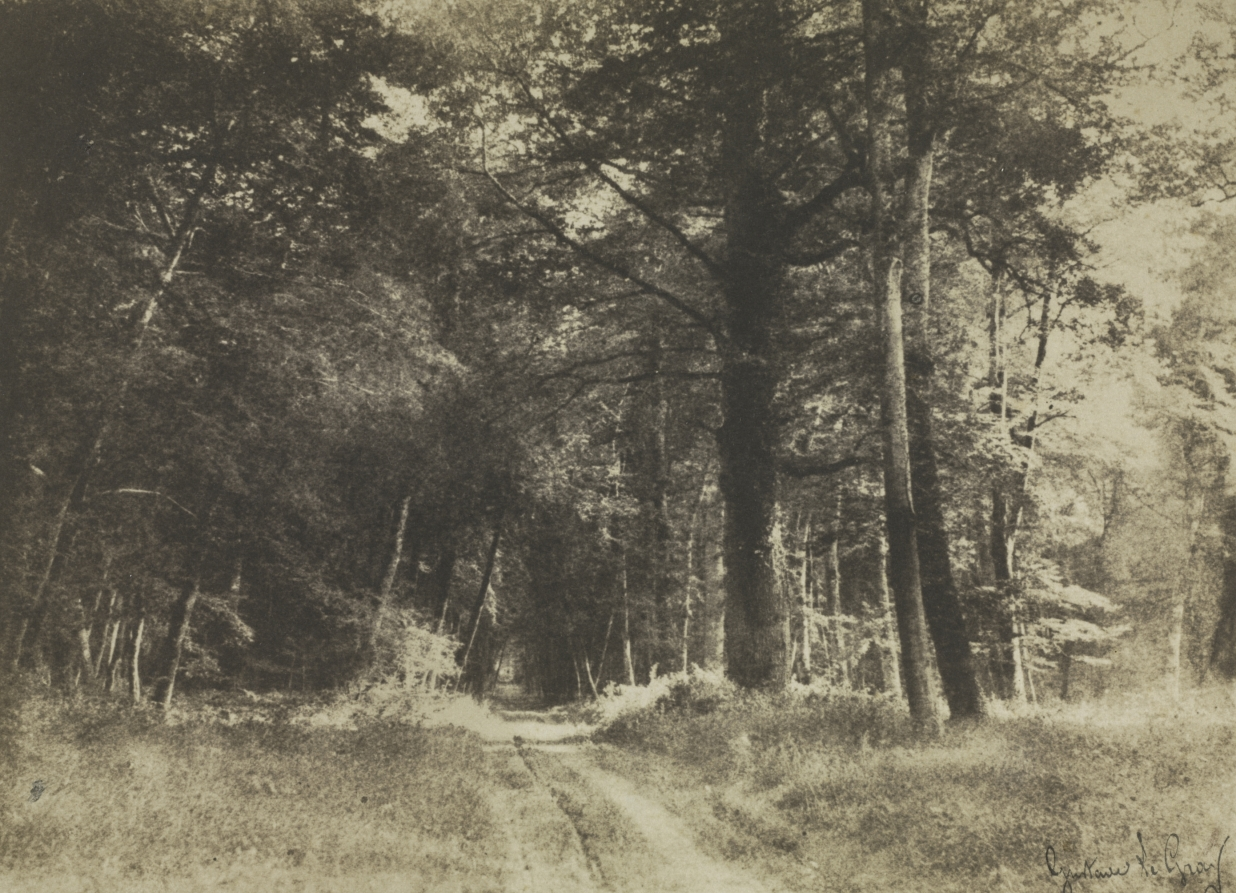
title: Pathway in the Forest of Fontainebleau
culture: France, 19th century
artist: Gustave Le Gray (French, 1820–1884)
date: 1849–52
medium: salted paper print from waxed paper negative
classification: Photograph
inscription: Written in black ink on recto: "Gustave Le Gray [signed]"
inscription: written in pencil on verso: "CW.56 / STL / 125"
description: One of the most inventive and influential French photographers of the 1850s, Le Gray was widely known for his landmark studies taken in the Forest of Fontainbleau, near Paris, from about 1849 to 1857. The photographs share a kinship with the work of the Barbizon painters, such as Corot, Daubigny, and Millet, who also worked there. Le Gray skillfully overcame technical problems to master the photographing of greenery and dark areas and to exploit the visual effects of light and atmosphere. In this enchanting scene, the viewer is drawn almost magnetically into a carriage trail surrounded by a dense archway of trees with sparkling sunlight filtering through the leaves.